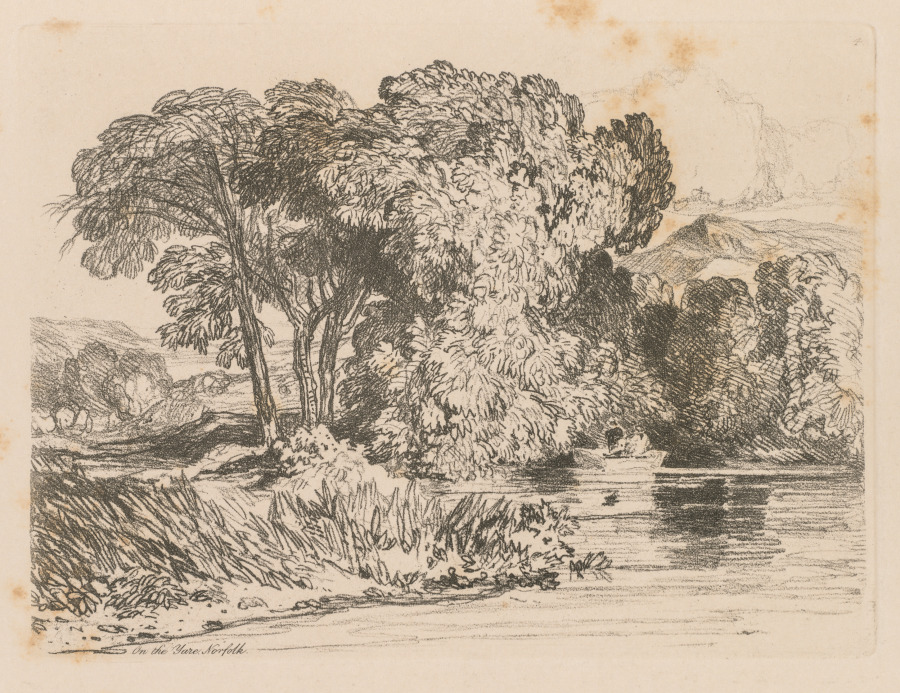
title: Liber Studiorum: Plate 4, View on the Yare, Norfolk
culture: England, 19th century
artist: John Sell Cotman (British, 1782–1842)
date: 1838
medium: softground etching, from a bound volume containing 48 plates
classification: Bound Volume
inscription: In plate, within image, upper right: 4; in plate, within image: On the Yare, Norfolk